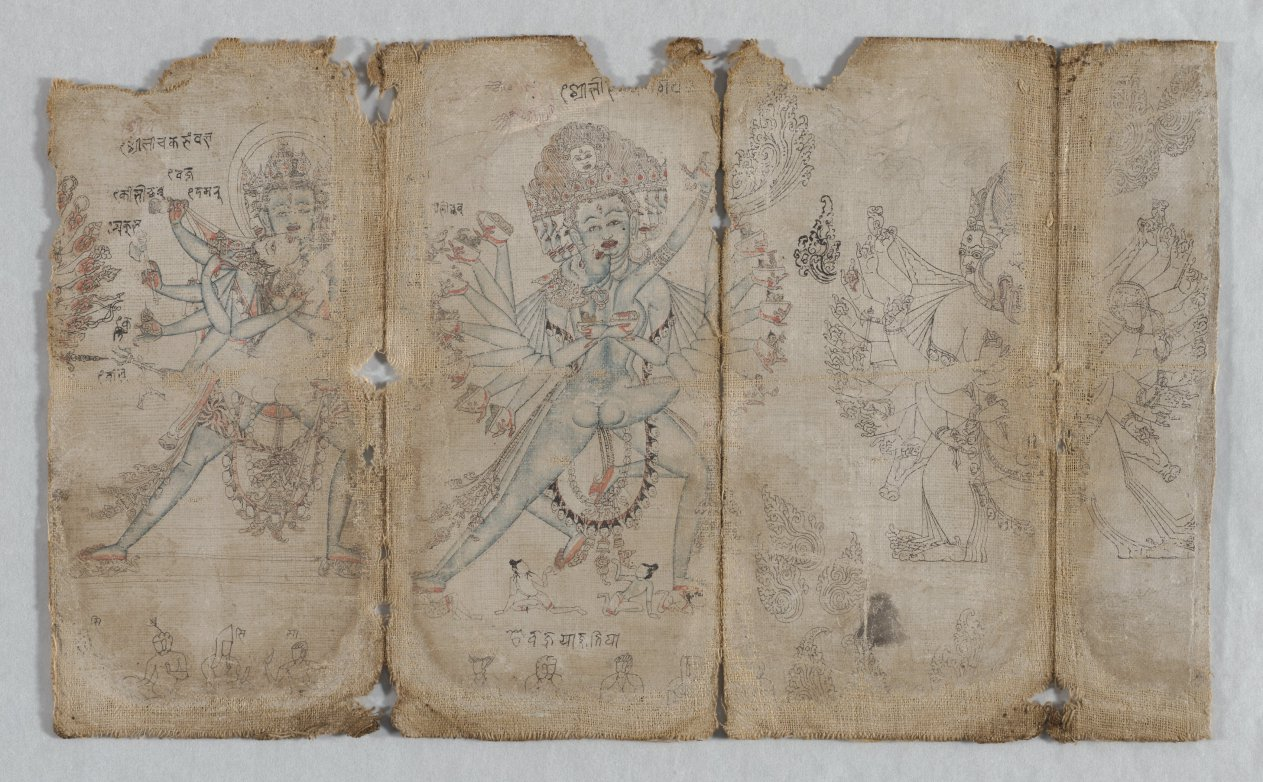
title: Iconographic Drawings: Chakrashamvara with Vajravarahi, Hevajra with Nairatmya, and Yamantaka (verso)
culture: Tibet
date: c. 1500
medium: ink and watercolor on cotton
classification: Drawing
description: These rare surviving pages of a practice book have drawings of prominent tantric figures. The line drawing is confident and masterful, with each iconographic element rendered with clarity and precision. The svelte proportions of the figures follow the style of the Khyenri school initiated in the second half of the 15th century by the artist Khyentse Wangchuk (about 1420-1500), known for his elegant and energetic depictions of the fierce manifestations of the enlightened beings. The best preserved example on this segment is the blue Hevajra in sexual union with Nairatmya, shown in a deeper shade of blue. Chakrashamvara, another powerful emanation of a Buddha, is at the left with his consort Vajravarahi, holding a variety of weapons, tantric implements, and an elephant skin representing the defeat of uncontrolled passions in his twelve hands. The buffalo-headed figure at the right is Yamantaka, a powerful form of the Bodhisattva of Wisdom. Tantric practitioners invoke this deity to aid in conquering fear of death, one of the most powerful hindrances to enlightenment.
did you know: The script notations are in an Indic script, but the line drawings are Tibetan.